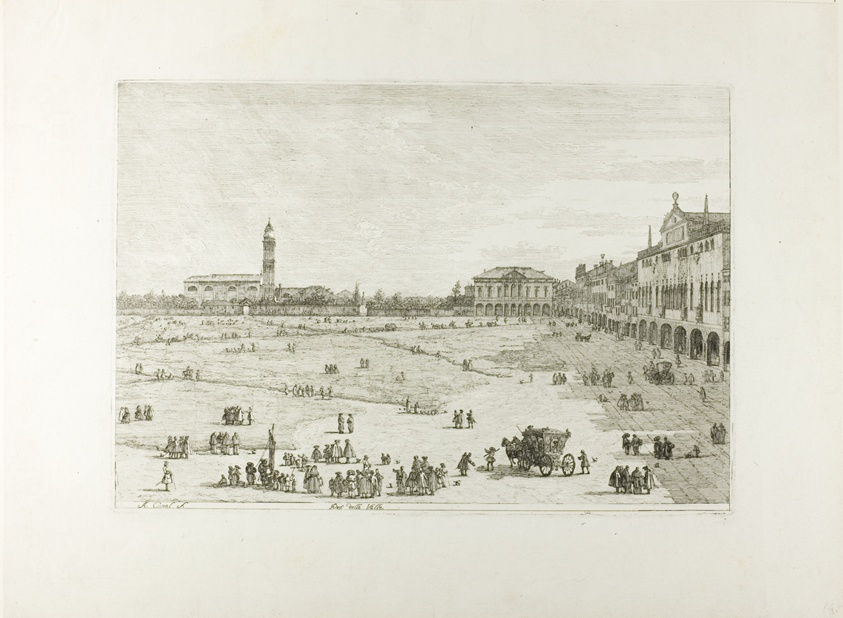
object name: Print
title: Prà della Valle, from Vedute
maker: Canaletto (Italian, 1697-1768)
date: 1735/44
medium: Etching in black on ivory laid paper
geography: Italy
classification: etching; print; prints and drawing